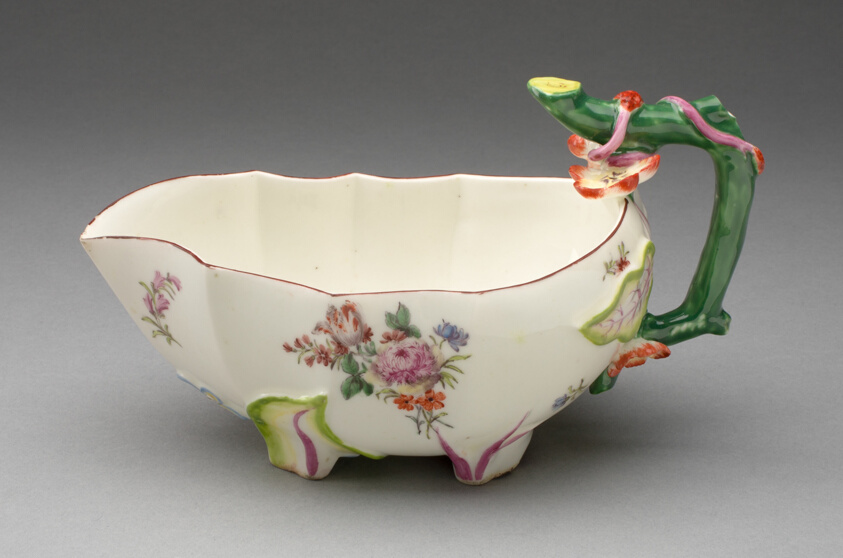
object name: Ceramics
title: Sauceboat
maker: Chelsea Porcelain Manufactory; London, England, c. 1745-1784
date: 1760/70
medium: Soft-paste porcelain, polychrome enamels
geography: Chelsea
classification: porcelain; ceramics; european decorative arts